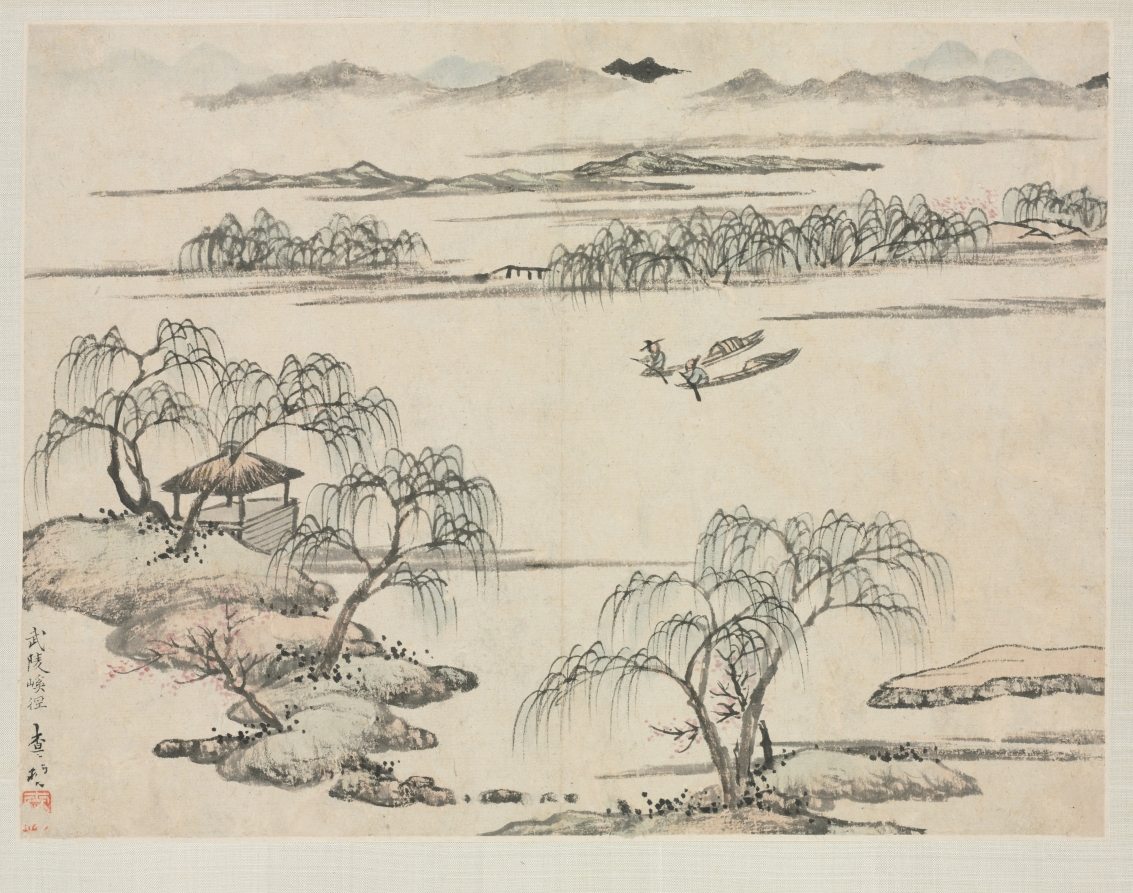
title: Landscape Album in Various Styles: The Stream of Wuling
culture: China, Qing dynasty (1644-1911)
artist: Zha Shibiao (Chinese, 1615–1698)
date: 1684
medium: album leaf, ink and light color on paper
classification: Painting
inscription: Artist's inscription, signature, and seal: The stream of Wuling. Zha Shibiao [seal] Shibiao.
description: At age 68, Zha Shibiao painted this album with seasonal landscapes in various styles. Painted in fresh colors and wet strokes, all depict typical scenes of Jiangnan. The mention of Wuling in the inscription signals the “Peach Blossom Spring,” but Zha Shibiao purposefully left out all the accepted iconography for that story: a lone fisherman, cave entrance, and village of hermits. Instead, two men in separate boats are engaged in conversation. Could they be talking about the way to the Peach Blossom Spring, or could one of them be that fisherman blessed by his unintended visit but no longer able to find his way back again? Around them unfolds a lyrical landscape, with willows along the shores, an empty pavilion, a wide-open lake surface, and endless distant hills.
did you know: Zha Shibiao, a native of Anhui province, moved to Yangzhou later in his career, like so many of his fellow countrymen.